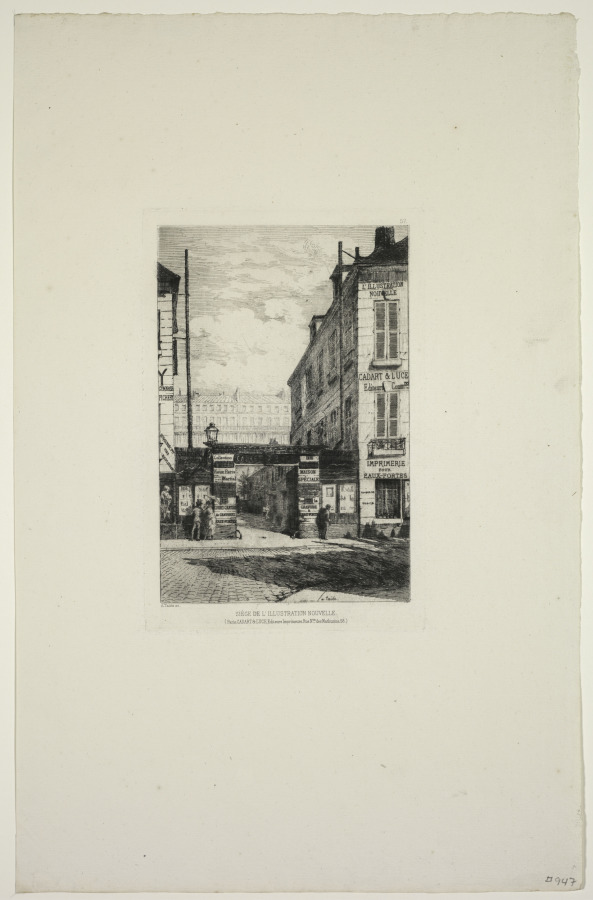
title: Headquarters of L'Illustration Nouvelle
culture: France, 19th century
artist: Alfred Taiée (French, 1820–1881)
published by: Cadart & Luce, Paris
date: 1869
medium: etching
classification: Print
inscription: Numbered on plate, upper right: 4 - 7,. Signed on plate: A. Taiée, and dated: 1871. Lettered alongside bottom with title and production detail: Imp. A. Cadart. Printed by Alfred Cadart